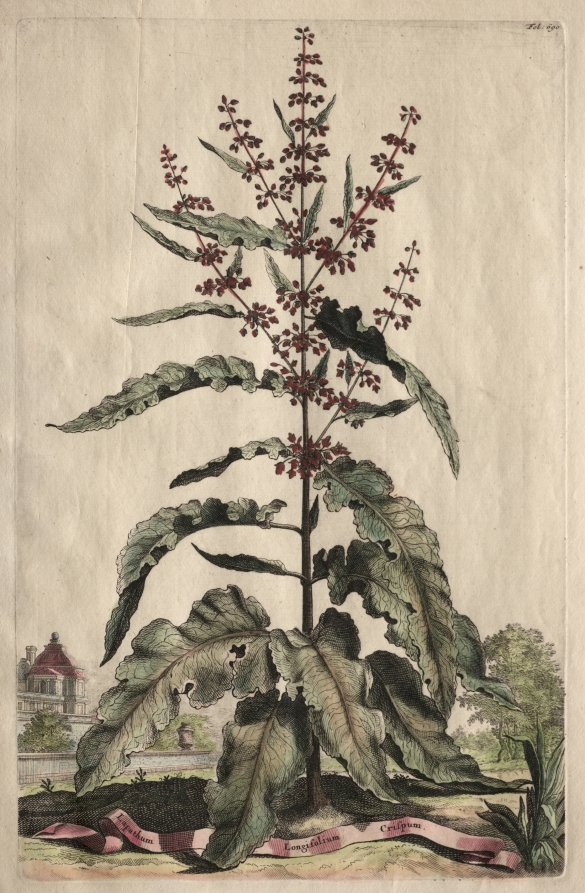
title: Phytographia Curiosa: Lapathum Longifolium Crispum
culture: Netherlands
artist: Abraham Munting (Dutch, 1626–1683)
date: c. 1651–83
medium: etching, hand colored with watercolor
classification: Print